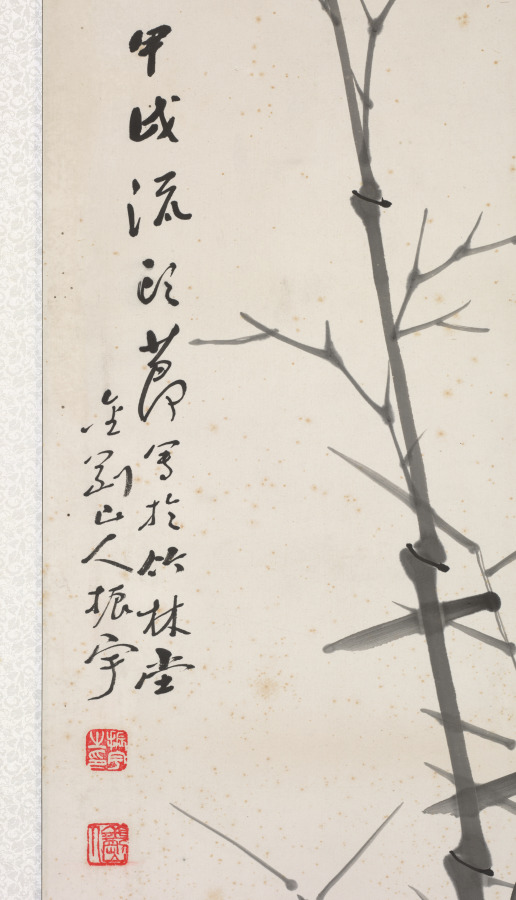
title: Bamboos in Wind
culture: Korea, Japanese colonial period (1910−1945)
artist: Kim Jin-woo (Korean, 1883–1950)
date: 1934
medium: Ten-panel folding screen; ink on paper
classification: Painting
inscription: Two chops stamped on each panel: 振宇之印 (Jinwoo’s Seal); 金剛山人 (Diamond Mountain Man)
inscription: Inscription written on the far-left panel: 甲戌流??寫於竹林堂金剛山人振宇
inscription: Inscription written on the 8th panel: 五百間淸風金剛山人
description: Active during the Japanese colonial period in Korea (1910–45), the artist Jin-woo Kim earned his artistic reputation for his expressive renditions of bamboo swaying in a strong wind. His piercing bamboo shoots are often compared to an iron spear, and their sharp leaves to a knife. It is believed that he deliberately emphasized sharpness in his brushstrokes to express his strong resistance against Japanese colonial oppression.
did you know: The artist’s prolific artistic production were a major part of fundraising efforts to support resistance activities for Korea’s independence.